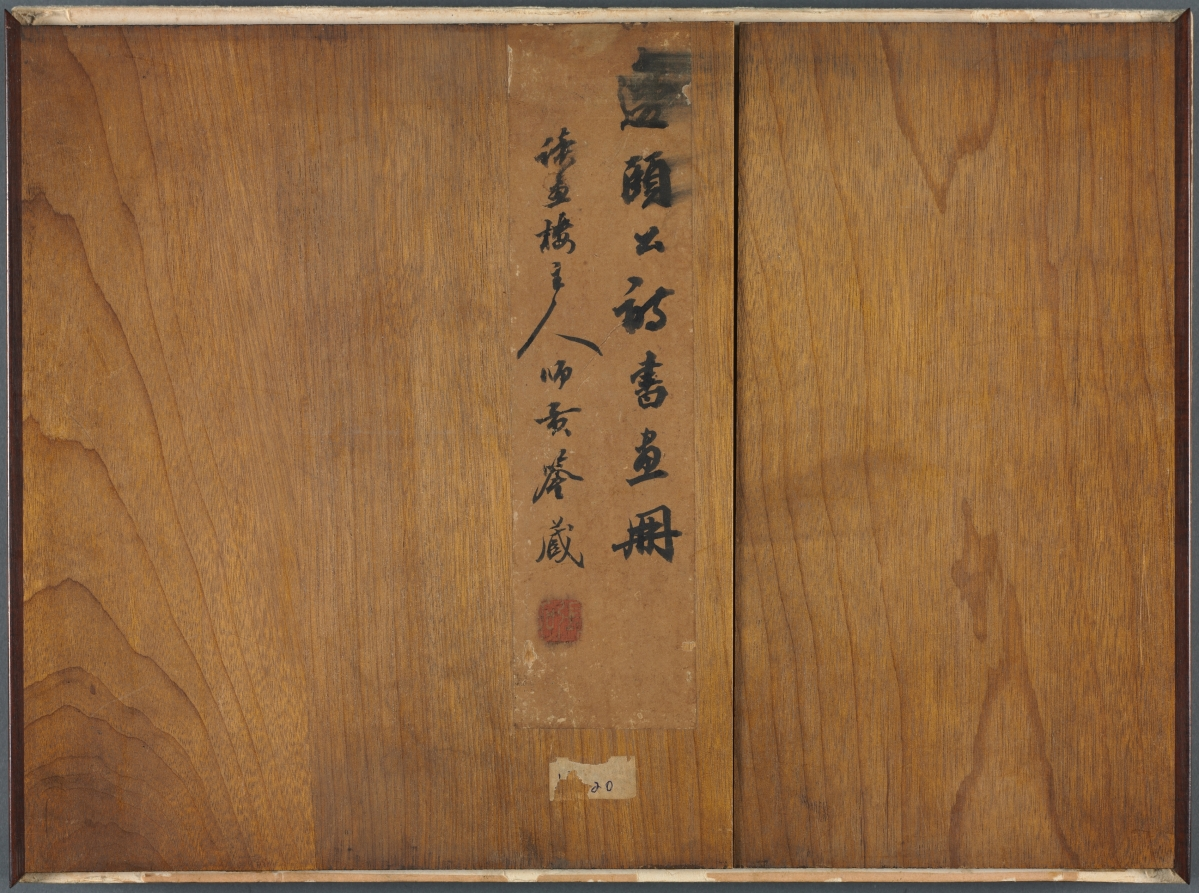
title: Album of Calligraphy and Paintings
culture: China, Qing dynasty (1644-1911)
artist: Bian Shoumin (Chinese, 1684–1752)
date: first half of the 1700s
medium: Album of twelve leaves, ink and color on paper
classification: Painting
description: The artist Bian Shoumin is known for his depiction of wild geese, water, and reeds. The migrant birds in autumn and winter evoked, in the minds of the Chinese intelligentsia, a time of parting and sorrow.